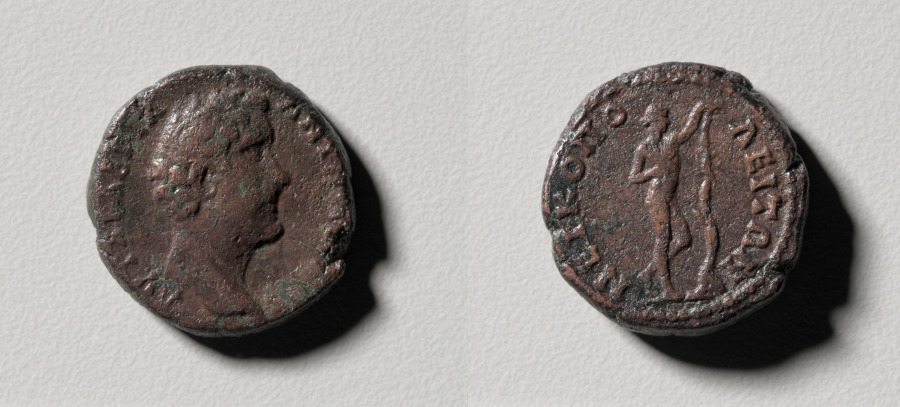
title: As: Head of Antoninus Pius (obverse); Apollo Sauroktonos (reverse)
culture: Roman, minted at Nicopolis ad Istrum (Moesia Inferior)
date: 138–161 CE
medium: bronze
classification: Coins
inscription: ΑV Τ ΑΙ ΑΔΡΙΑ ΑΝΤ[ΩΕΙΝΟΣ]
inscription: ΝΕΙΚΟΠΟ - ΛΕΙΤΩΝ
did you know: Antonius Pius, shown on this coin, was Roman emperor from 138 to 161 CE. He was one of the Five Good Emperors in the Nerva–Antonine dynasty and the Aurelii.